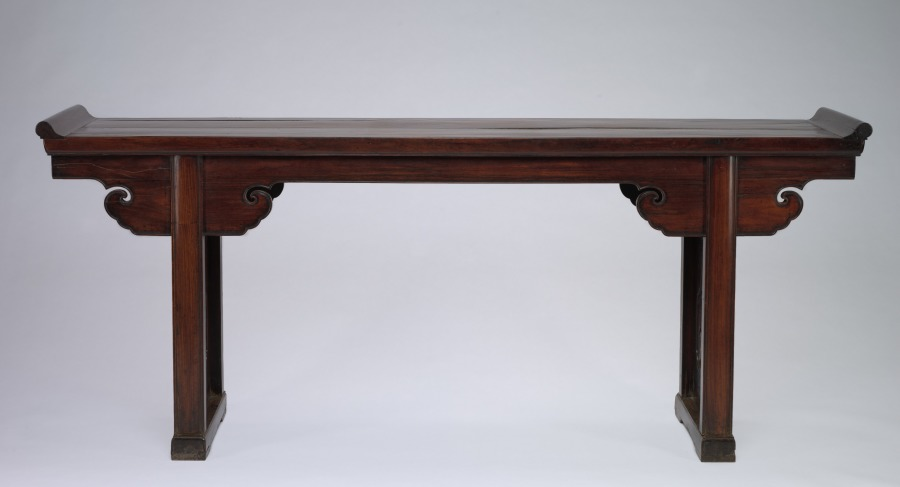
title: Side Table with Everted Ends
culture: China, Ming dynasty (1368–1644)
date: late 1500s–1600s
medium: redwood veneer and camphor wood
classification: Furniture and woodwork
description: Classic Chinese furniture is an art of carpentry and joinery, which makes use of a mortise-and-tenon framework. Design and craftsmanship, coupled with the organic material of the hardwood, create endless aesthetic possibilities. This side table is beautifully carved with cloud-collar spandrels on the aprons as well as openwork panels with cloud-collar patterns inset between the legs and the feet. The table has a narrow top in proportion to its length and bears the detail of the upturned ends that makes it more formal, and possibly used as an altar table.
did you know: Camphor wood is excellent for furniture making because of its attractive wood grain patterns and its distinctive scent that repels insects.